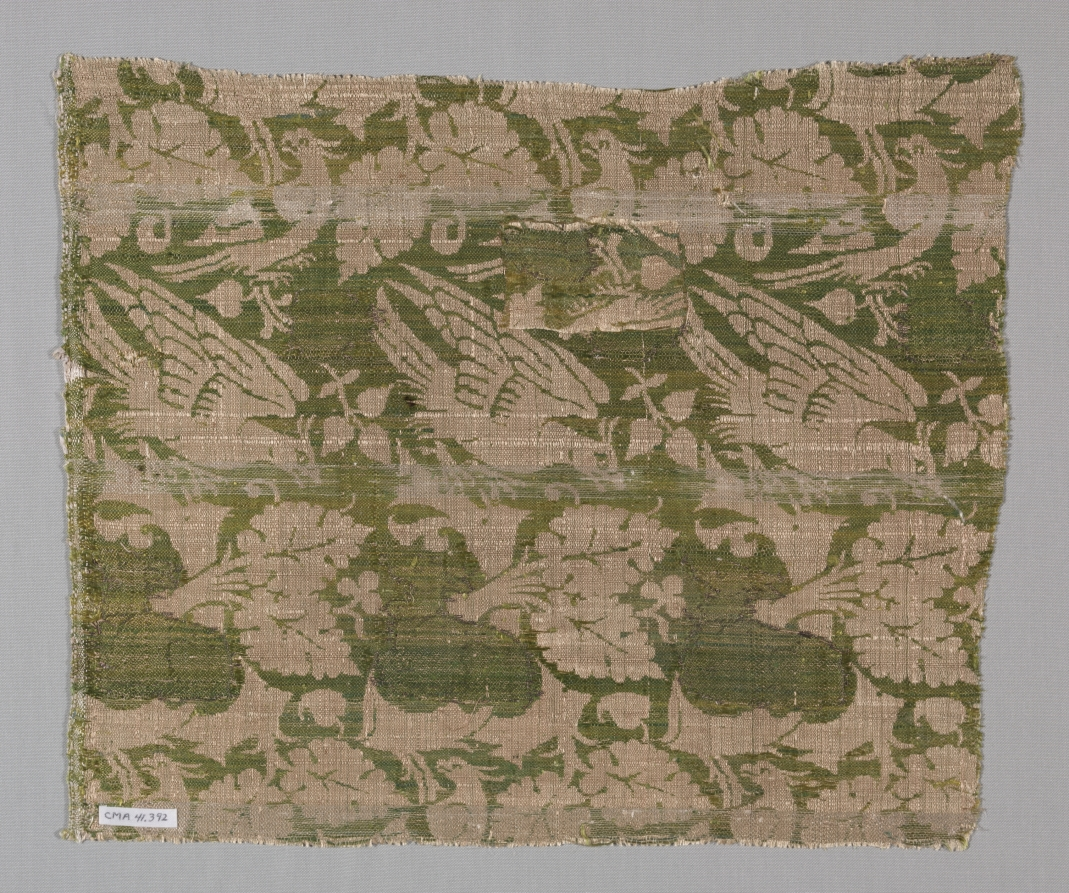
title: Silk and Gold Textile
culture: Italy, 15th century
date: 1420–1430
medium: lampas weave, silk and gold thread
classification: Textile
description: Lucca, Venice, Florence, Bologna, and Genoa are known to have been the principal silk weaving cities in Italy during the 14th and 15th centuries. It is not possible, however, to distinguish which silks were woven in each city. Silks like these were sold to royalty, nobility, and churches throughout Europe by Italian merchants in Bruges, Antwerp, Paris, London, and Avignon.